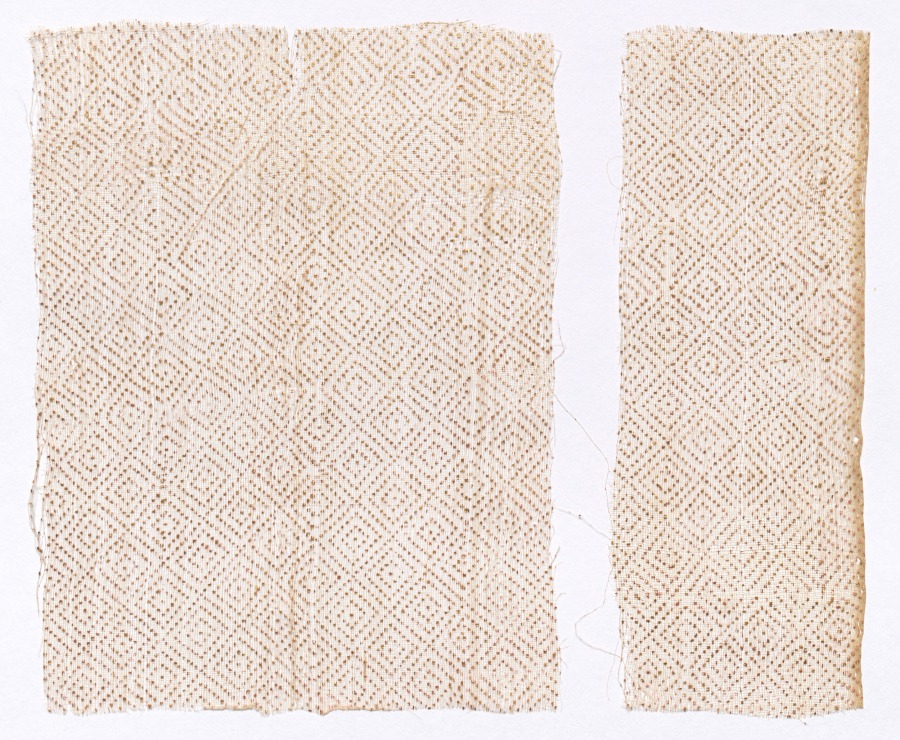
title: Fragments of Draped Court Apparel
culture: India, Rajasthan ?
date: 1800s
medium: Block printed with gold leaf (varak) on undyed plain weave cotton muslin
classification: Textile